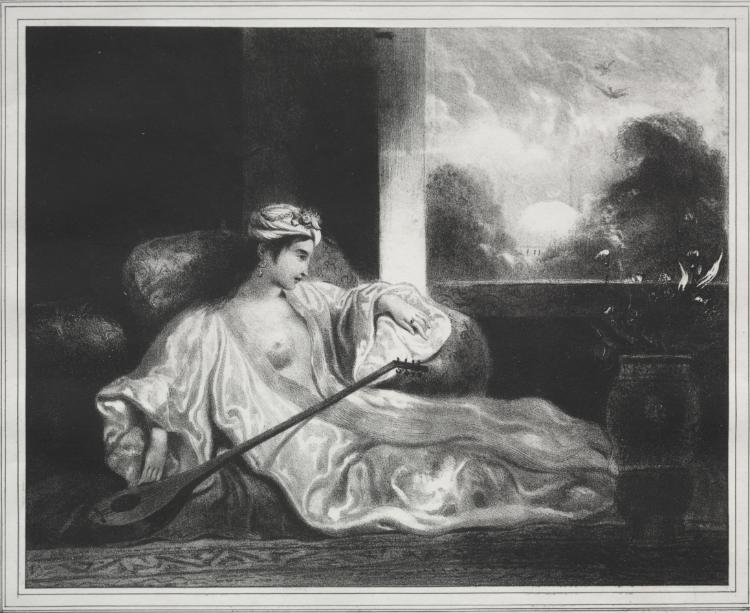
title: Orientalia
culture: France, 19th century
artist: Louis Candide Boulanger (French, 1806–1867)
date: c. 1830s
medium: lithograph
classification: Print